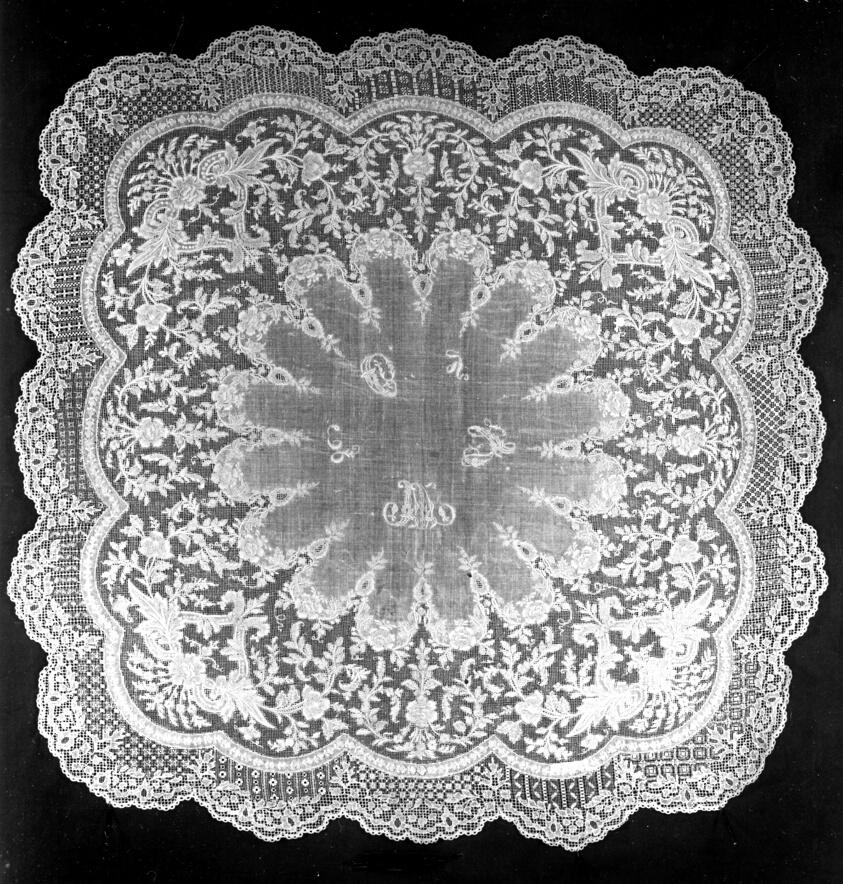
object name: Textile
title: Handkerchief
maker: Philippines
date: 1860s/80s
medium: Pineapple fiber, plain weave; pulled thread work in back, buttonhole, cloth, cross, darning, double running, feather, four-sided, herringbone, Indian drawn ground, overcast, Roumanian, single faggot and double stitches; couching and darned points and wheels; embroidered with cotton in back, buttonhole, double running, overcast, satin, padded satin, and single satin stitches; French knots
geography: Philippines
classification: textile; needlework (visual works)